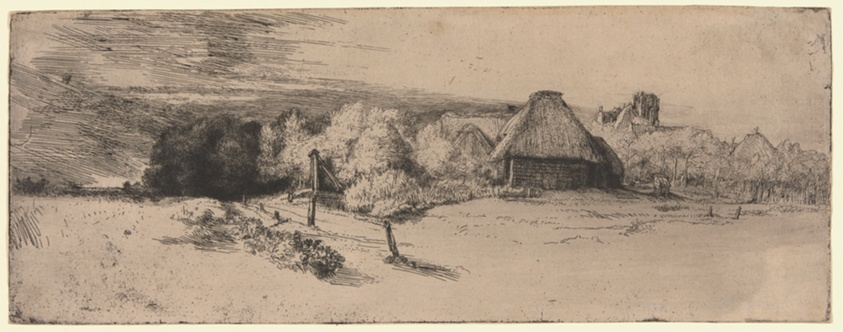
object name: Print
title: Landscape with a Farm Building and the "House with the Tower"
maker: Rembrandt van Rijn (Dutch, 1606-1669)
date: c. 1650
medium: Etching and drypoint on Japanese paper, laid down on cream laid paper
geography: Holland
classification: etching; print; prints and drawing; paper; drypoint